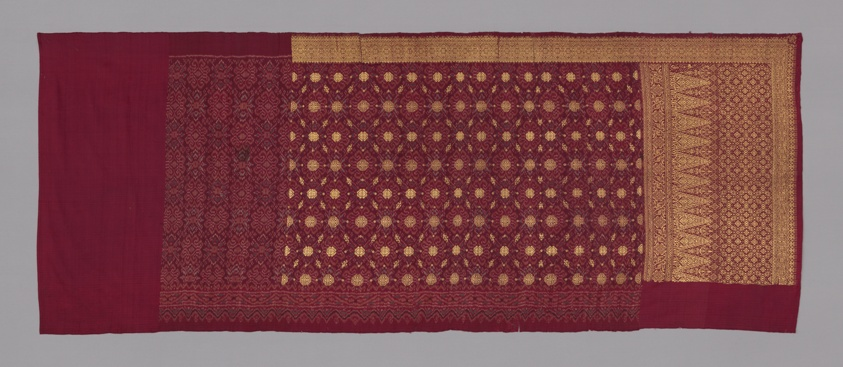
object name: Costume and Accessories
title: Woman's Ceremonial Skirt (Kain pantang)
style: indonesian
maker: Indonesia, Sumatra, Palembang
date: 19th century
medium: Silk and gold-leaf-over-lacquered-paper-strip wrapped silk, warp and weft resist dyed (double ikat), plain weave with supplementary brocading wefts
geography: Sumatra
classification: weaving - printed; costume